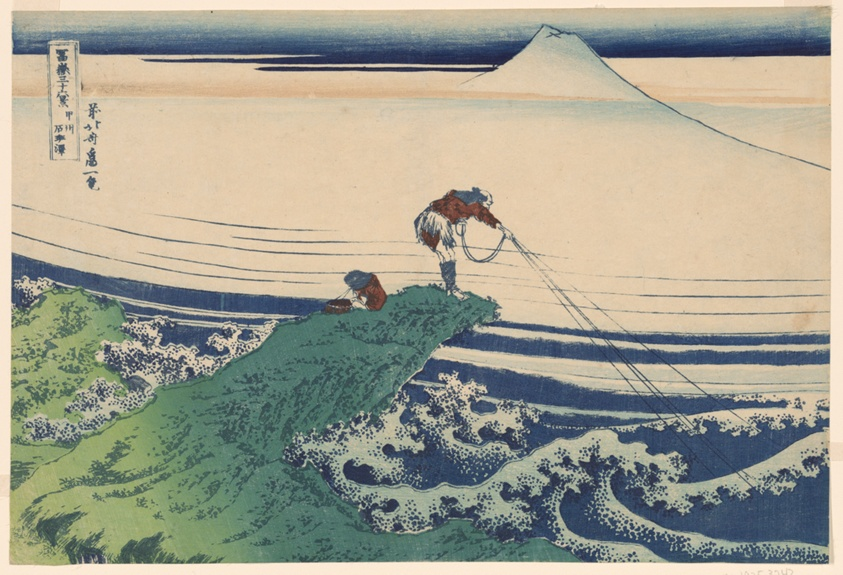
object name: Print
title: Kajikazawa in Kai Province (Koshu Kajikazawa), from the series "Thirty-six Views of Mount Fuji (Fugaku sanjurokkei)"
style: Japanese (culture or style)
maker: Katsushika Hokusai 葛飾 北斎; Japanese, 1760-1849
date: c. 1830/33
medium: Color woodblock print; oban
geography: Japan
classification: woodblock print; print; asian art